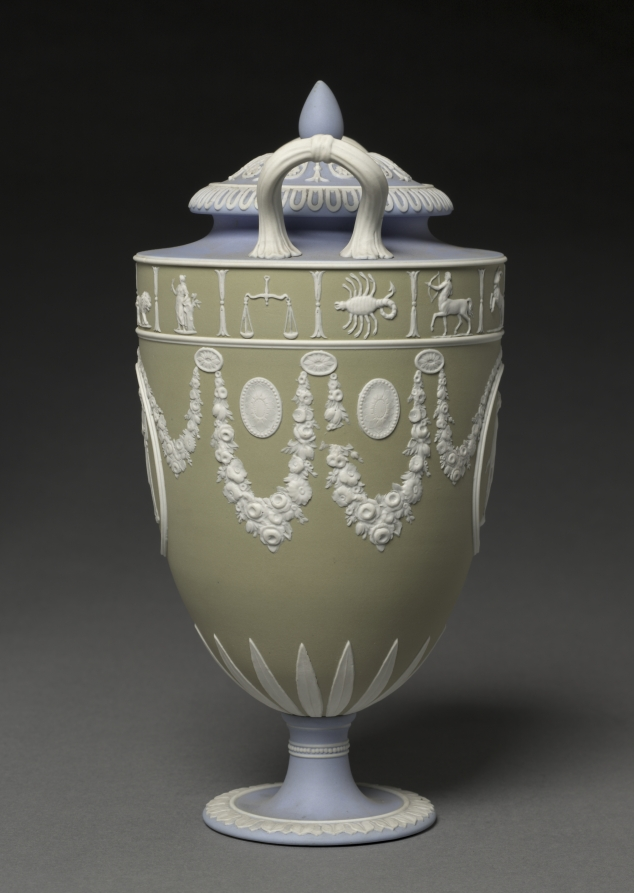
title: Covered Vase (one of a pair)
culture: England, Staffordshire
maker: Josiah Wedgwood and Sons (British, Staffordshire, est. 1759)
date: c. 1850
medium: jasper ware with relief decoration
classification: Ceramic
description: Wedgwood's tricolor jasperware first became popular in the 1770s during a period of fascination with neoclassical decoration. This vase was probably made around 1850 during the period when this type of decoration was revived. The relief medallions depict two versions of the Greek god Apollo, the god of music, next to his harp or lyre.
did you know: Signs of the zodiac form a decorative border around the upper portion of this vase.